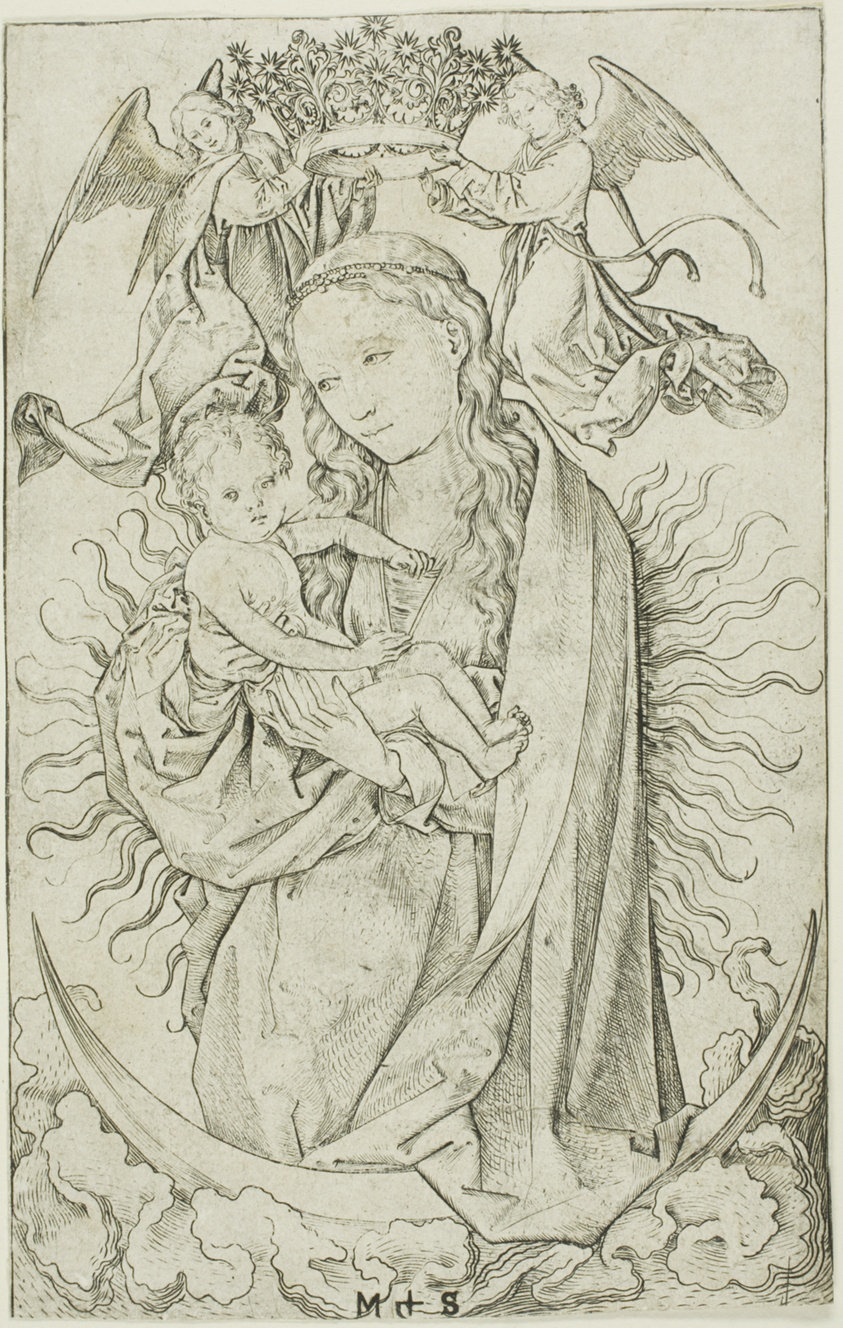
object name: Print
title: The Madonna on the Crescent Crowned by Two Angels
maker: Martin Schongauer (German, c. 1430/50-1491)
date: 1470–75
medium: Engraving on paper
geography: Germany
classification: engraving; print; prints and drawing